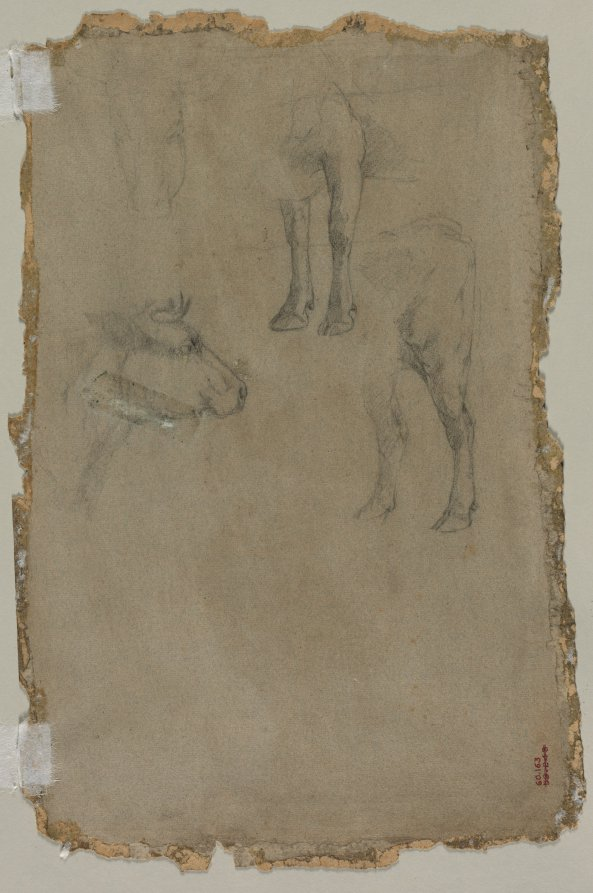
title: Studies of a Bull (verso)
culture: Netherlands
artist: possibly by Johan Barthold Jongkind (Dutch, 1819–1891)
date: 1864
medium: black chalk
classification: Drawing